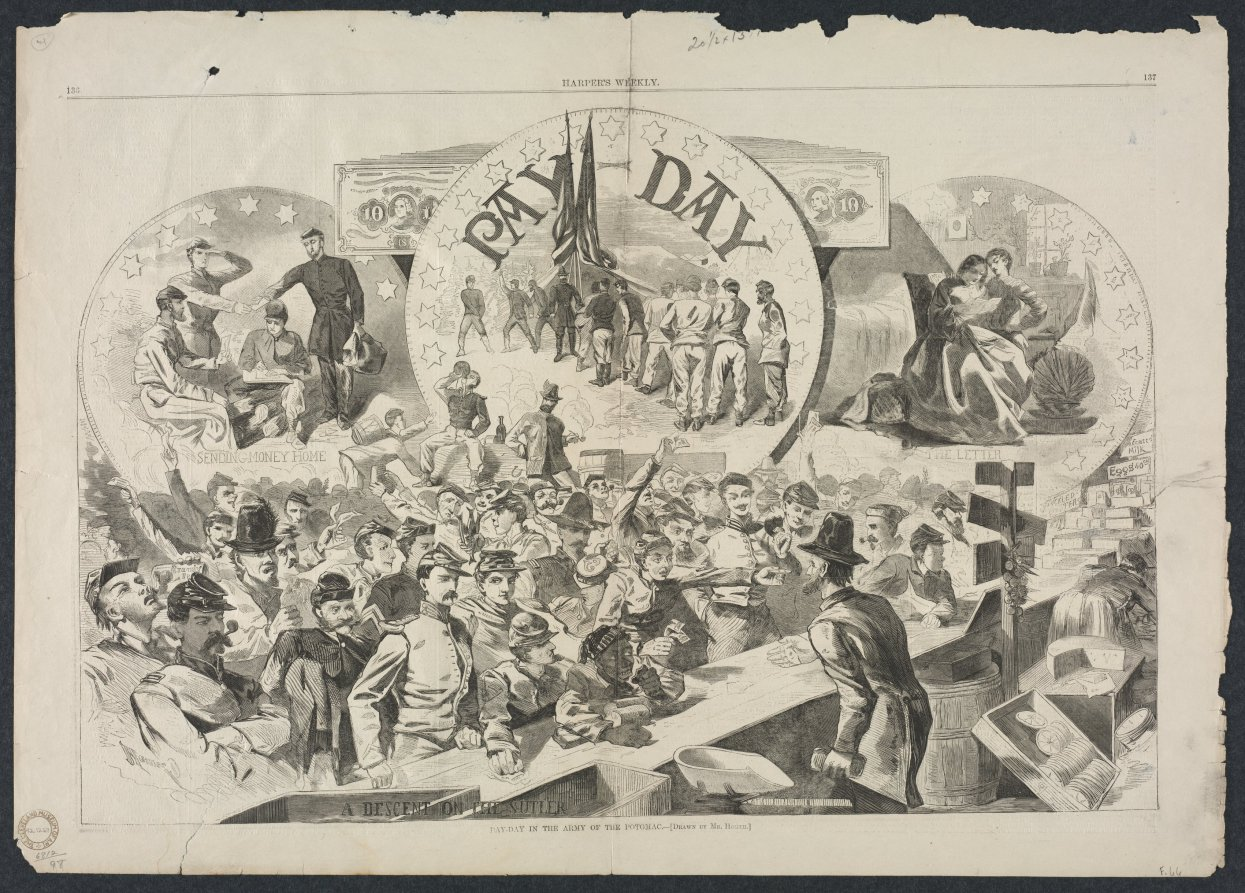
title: Pay Day in the Army of the Potomac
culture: America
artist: Winslow Homer (American, 1836–1910)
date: 1863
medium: wood engraving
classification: Print